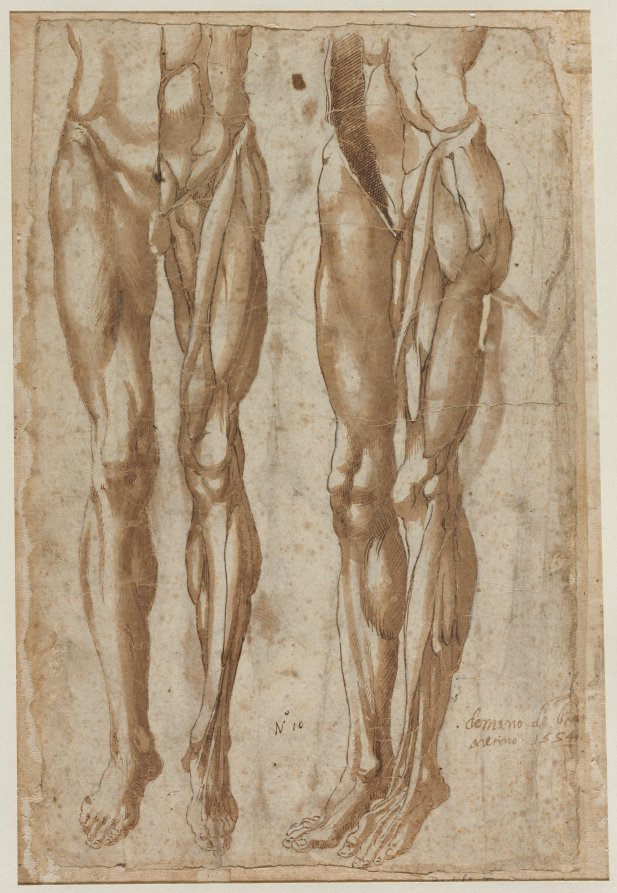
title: Two Studies of a Flayed Man (recto)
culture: Italy, 16th century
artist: Bartolommeo da Arezzo (Italian, active about 1550–80)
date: 1554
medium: pen and brown ink and brush and brown wash over black chalk; incised (both figures) and pricked (left figure)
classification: Drawing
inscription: signed, lower right, in brown ink: demano de bart / aretino . 1554 . [underlined] ; by artist(?), lower center, in brown ink: N° 10 ; lower right, in graphite [Bartolo° T?] [partially masked]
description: In order to understand the movement of the human form, Michelangelo was known to have studied flayed bodies (cadavers with their skin removed) and in fact made several drawings of them. Bartolommeo da Arezzo—a follower of Michelangelo working a generation after the master—became obsessed with studying corpses, even stealing them from local graveyards. On one side of this sheet (recto), he drew two views of the lower part of the same body, which is half flayed and shown hanging above the ground.